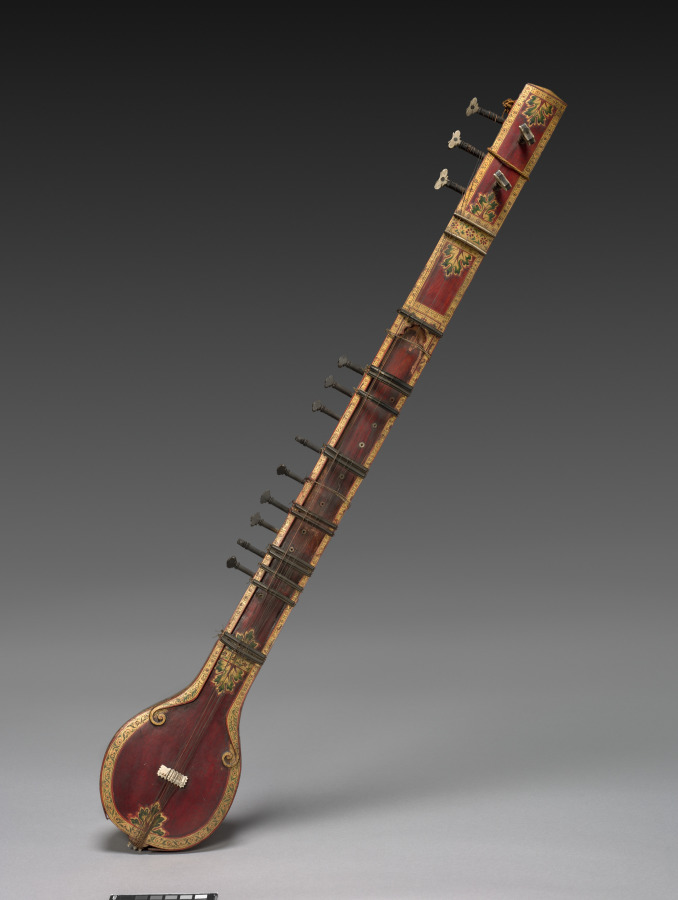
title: Sitar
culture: Eastern India, Bengal or Bangladesh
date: c. 1850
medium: Gourd and wood with pigment, ivory, and bone; copper alloy: frets; iron alloy: strings (with one modern copper replacement)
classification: Musical Instrument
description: The stringed instrument known as the sitar usually provided the central sound for the musical performances that were a constant feature of court life in India. The sitar could then be accompanied by percussion, voice, and other supporting instruments. In Raja Deen Dayal’s photograph Maharaja of Rewa in Prayer (2016.266.21), a musician strums a sitar in order to please the deities on the royal altar. The improvised compositions are played in a mode, or key, that correlates to the time of day and season of the year.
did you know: Many paintings of Indian court life depict female musicians holding and playing this kind of lightweight stringed instrument.